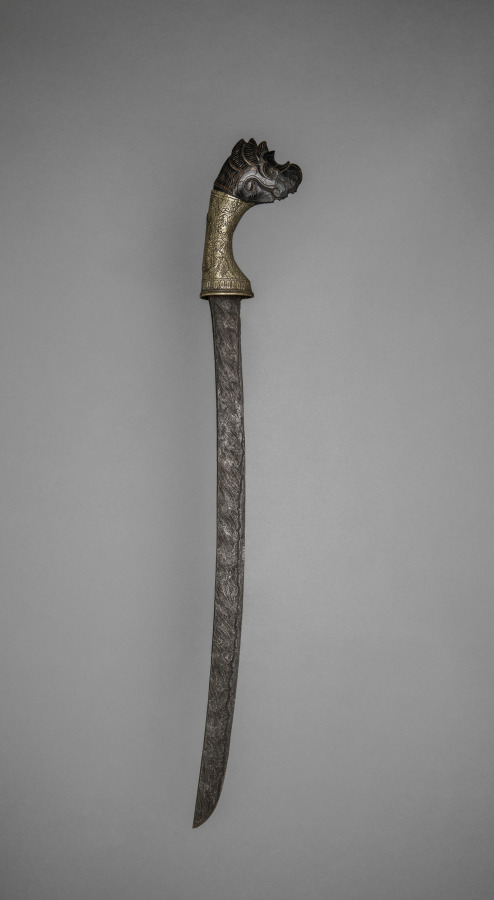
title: Sword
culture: Indonesia, Sulawesi (Celebes)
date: before 1916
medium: metal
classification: Arms and Armor